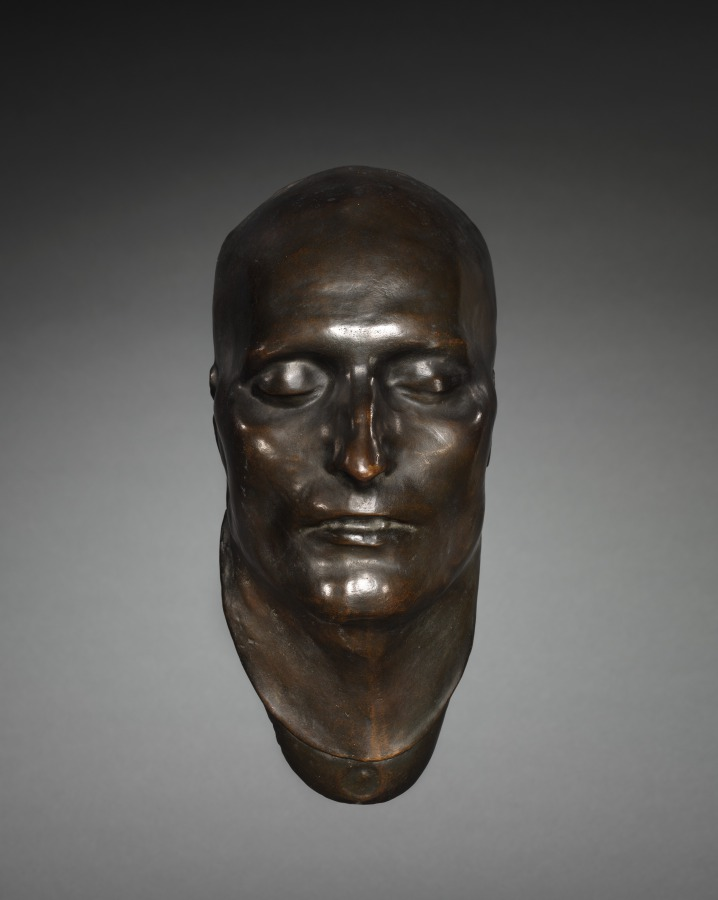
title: Mask of Napoleon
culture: Italy, 19th century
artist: C. Francesco Antommarchi (Italian, 1780–1838)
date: early 19th century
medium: bronze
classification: Sculpture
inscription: Signed on one side, inscribed on the other: "A Loie Fuller. E. Rudier, fondeur"